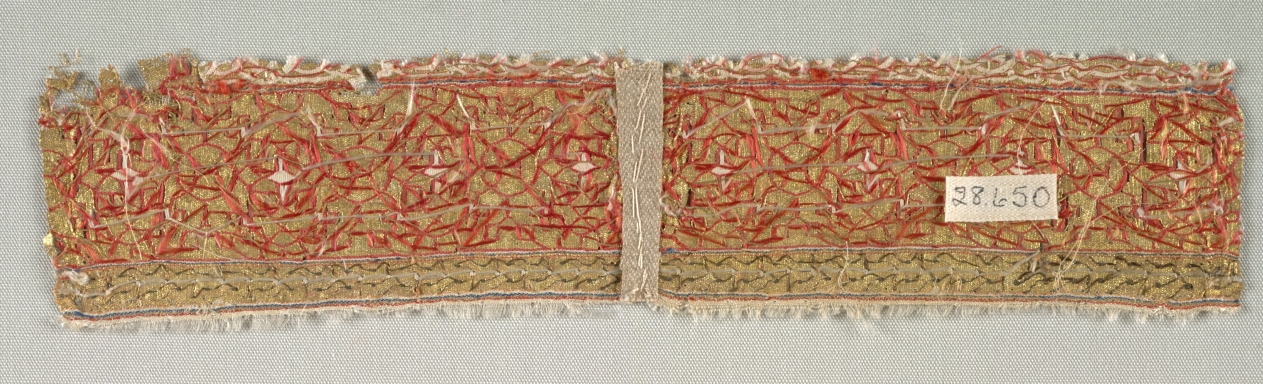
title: Guilloche band, from a dalmatic of San Valero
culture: Spain, probably Almeria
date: 1200s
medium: tapestry weave: silk and gold thread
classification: Textile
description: Rarely do medieval silks convey their original luxurious quality with such brilliant gold thread. This fragment is said to have been among relics of Saint Valerio from Lérida Cathedral (in northeast Spain, near Barcelona). An elegant geometric tracery in crimson silk decorates the gold-thread ground, bordered above by four interlacing strands in ivory silk and below by two rows of "figure 8s" woven with gold thread and black silk outlines.